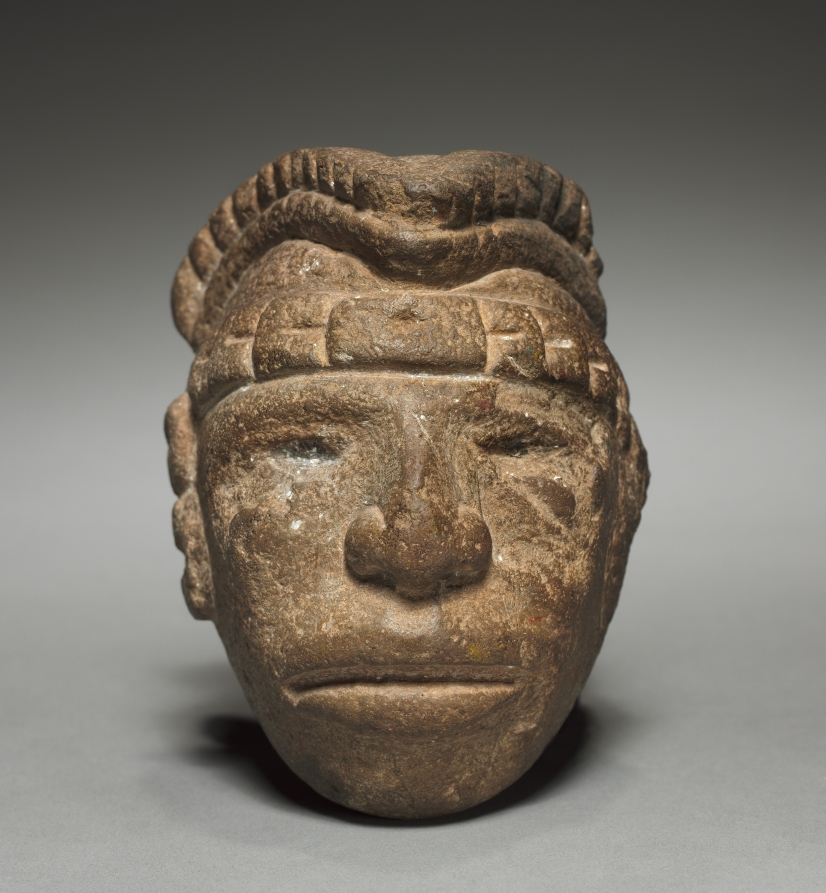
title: Head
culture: Mexico, Classic Veracruz (Totonac or Tajin)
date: 600–1100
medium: stone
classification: Sculpture